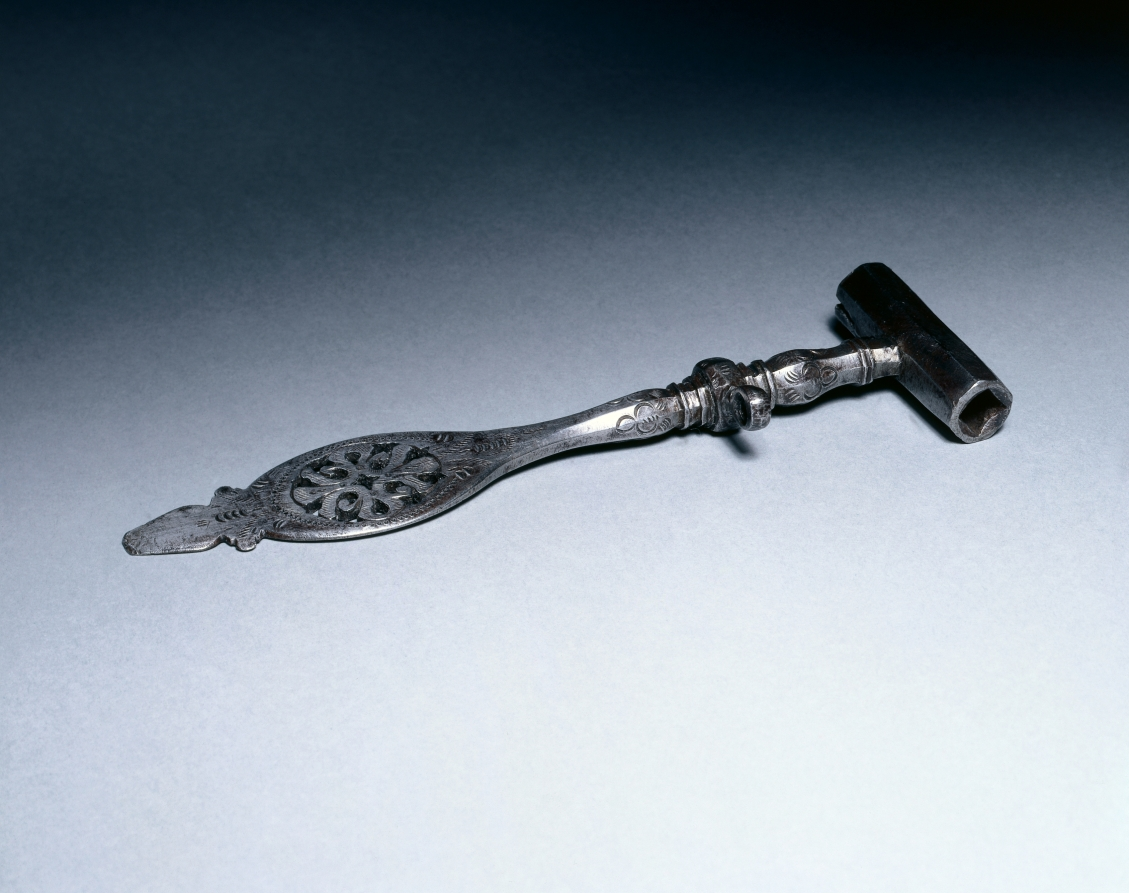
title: Spanner for a Wheel-Lock Gun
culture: Germany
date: c. 1600–1650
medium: steel, with punched, engraved, and pierced decoration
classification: Arms and Armor